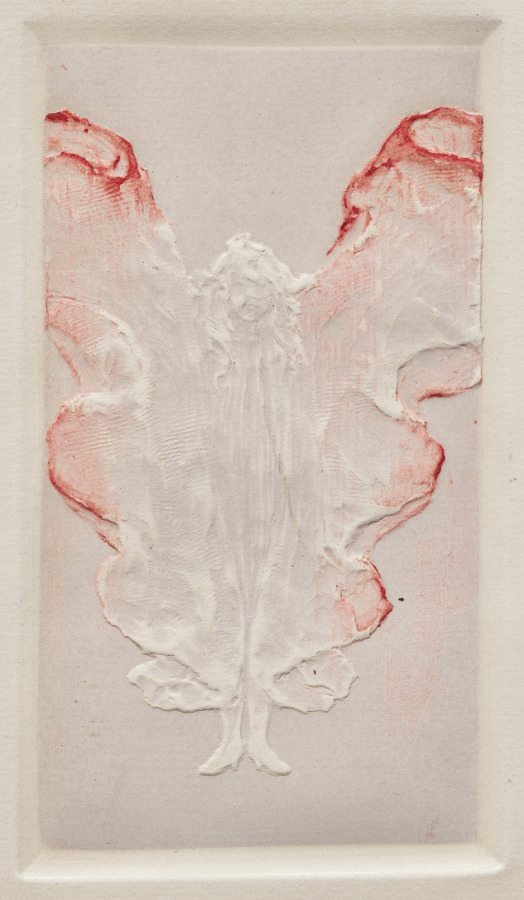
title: Dancing Woman with Arms Raised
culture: France, early 20th Century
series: La Loïe Fuller, by Roger Marx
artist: Pierre Roche (French, 1855–1922)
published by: Les Cents Bibliophiles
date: 1904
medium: gypsograph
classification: Bound Volume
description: Although best known as a sculptor, Roche was a versatile and prolific artist who worked in many mediums. Loïe Fuller, the pioneer of modern dance who took Paris by storm in 1892, was one of his favorite subjects. He portrayed her in clay, bronze, marble, plaster, and in a series of gypsographs that illustrated an essay by the art critic Roger Marx. The book was described as "a precious monument to Loïe Fuller."